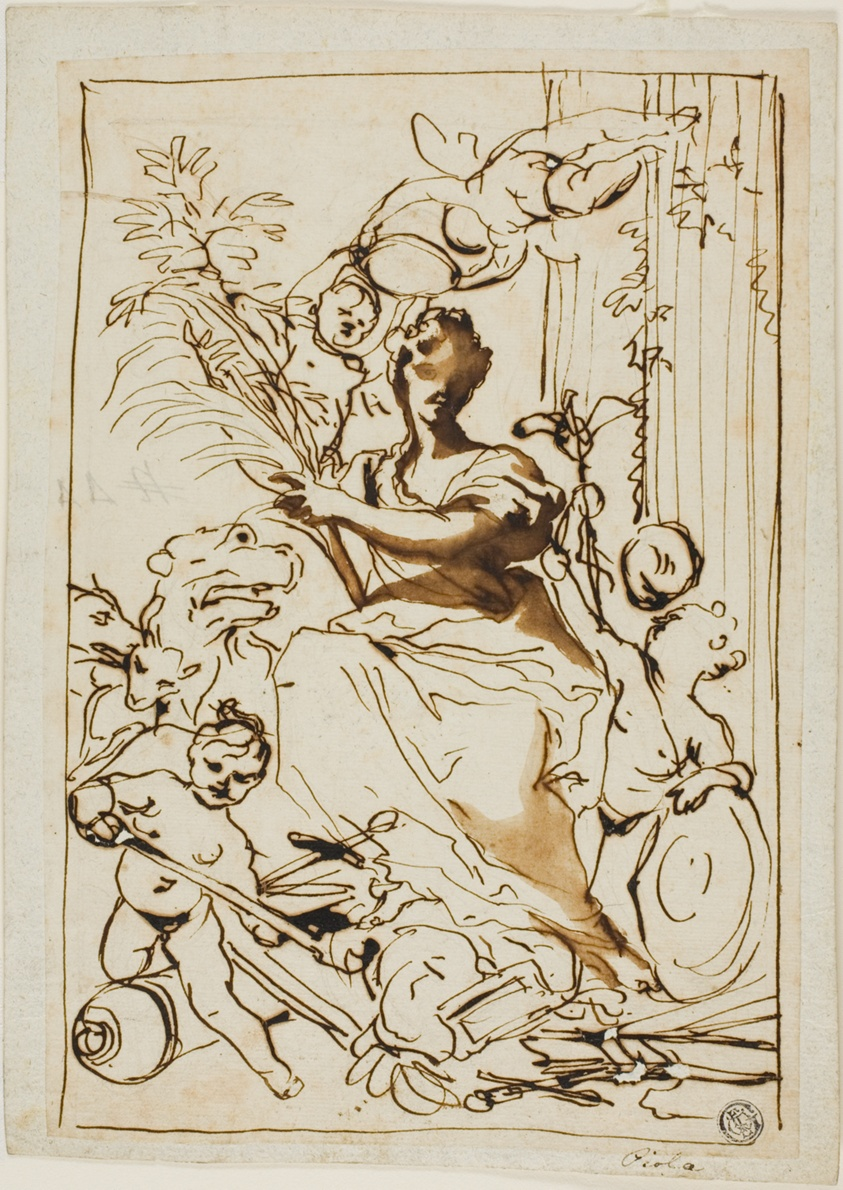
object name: Drawing and Watercolor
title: Allegory of Victory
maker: Domenico Piola (Italian, 1627-1703)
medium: Pen and iron gall ink, with brush and brown wash, over traces of black chalk on cream laid paper, laid down on ivory laid paper with blue fibers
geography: Italy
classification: pen and ink drawings; drawings (visual works); prints and drawing